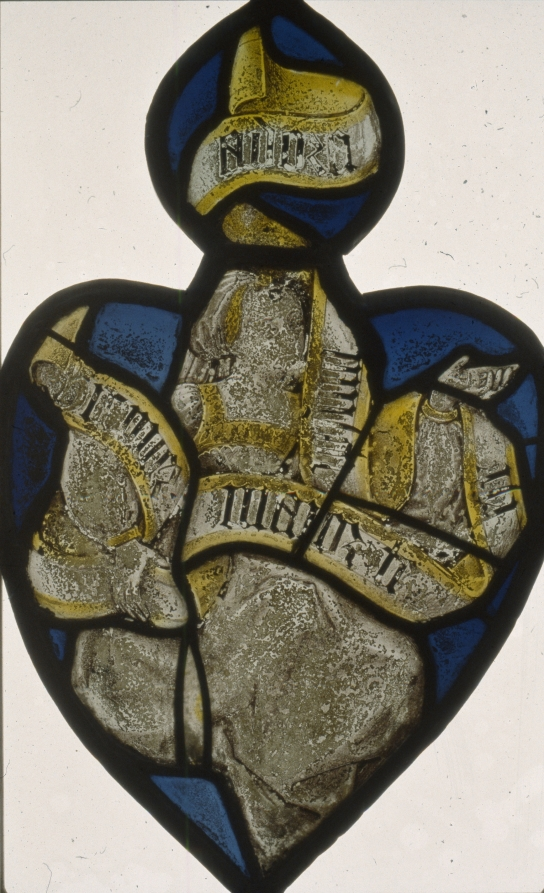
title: Heart-Shaped Panel: Figure of a Woman with a Banderole (Sibyl ?)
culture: Germany, Rhenish (?), late 15th - early 16th centuries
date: c. 1480–1520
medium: pot metal, white glass with silver stain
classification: Glass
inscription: blue, yellow and silver-colored glass inscribed: HIC PUER MAIOR TE EST. (This Child is Greater than You are).